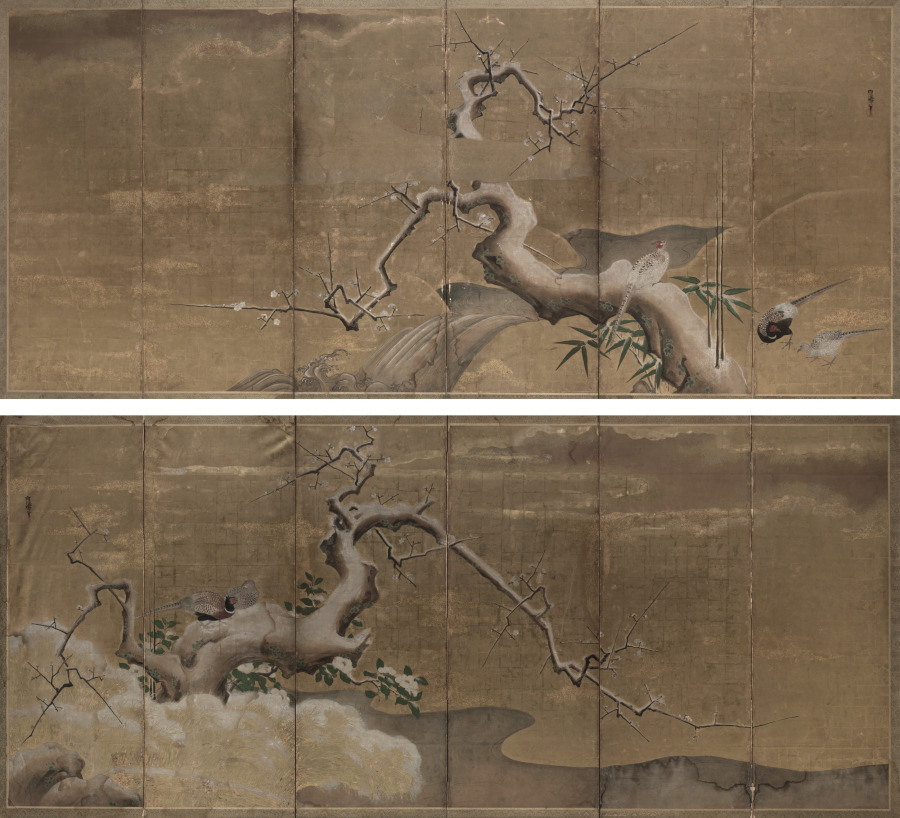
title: Winter Scene with Plum Trees and Pheasants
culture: Japan, Edo period (1615–1868)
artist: Kano Naonobu (Japanese, 1607–1650)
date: early 1600s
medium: pair of six-fold screens, mineral pigments and gold leaf on paper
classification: Painting